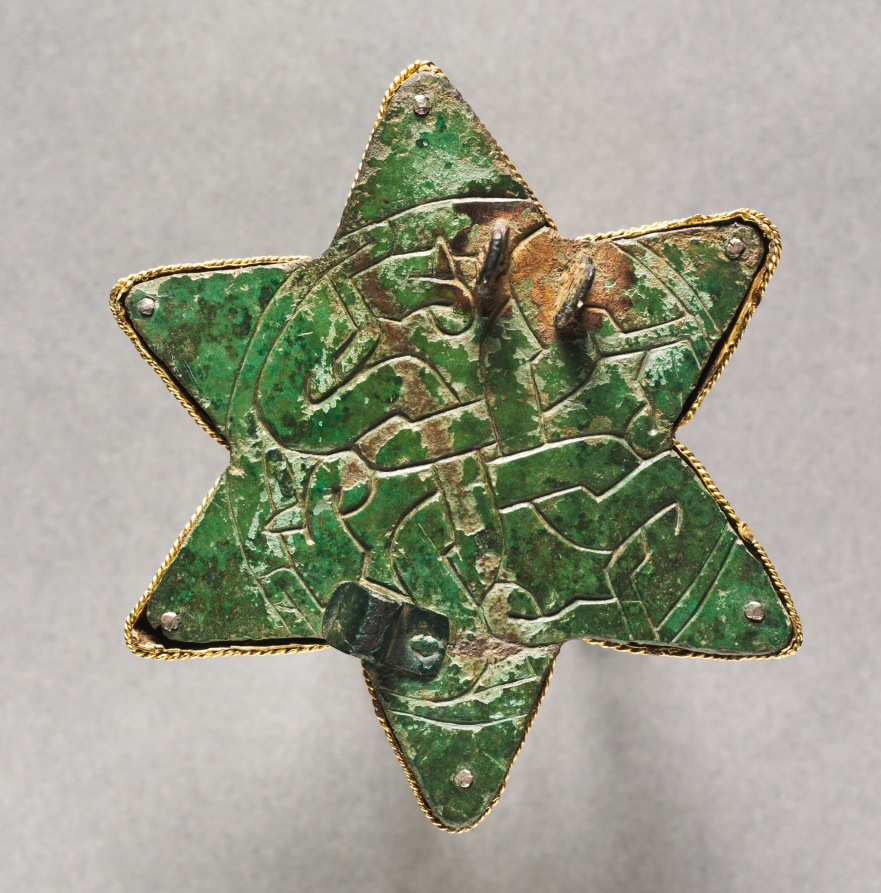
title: Brooch in the Form of a Six-Pointed Star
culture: Frankish, early Carolingian, late 8th century - early 9th century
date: late 700s-early 800s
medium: gold with repoussé and filigree decoration; copper backplate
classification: Metalwork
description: Women used brooches like this to fasten their veils beneath the chin. Its rare form--a hexagram--suggests that it also functioned as a talisman or amulet to attract good luck and to ward off evil.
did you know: Look carefully at this brooch and notice a small animal, perhaps a dragon, camouflaged amid the swirling whirls of gold.